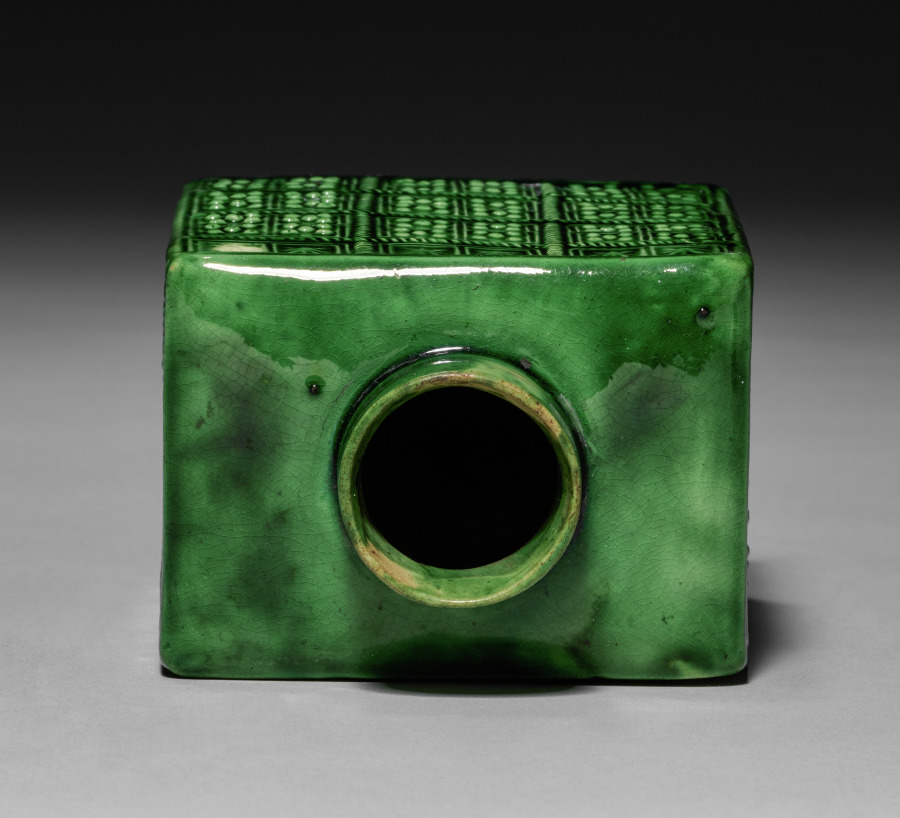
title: Tea Caddy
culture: England, 18th century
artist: Staffordshire Factory (British)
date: c. 1750–1800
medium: earthenware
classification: Ceramic